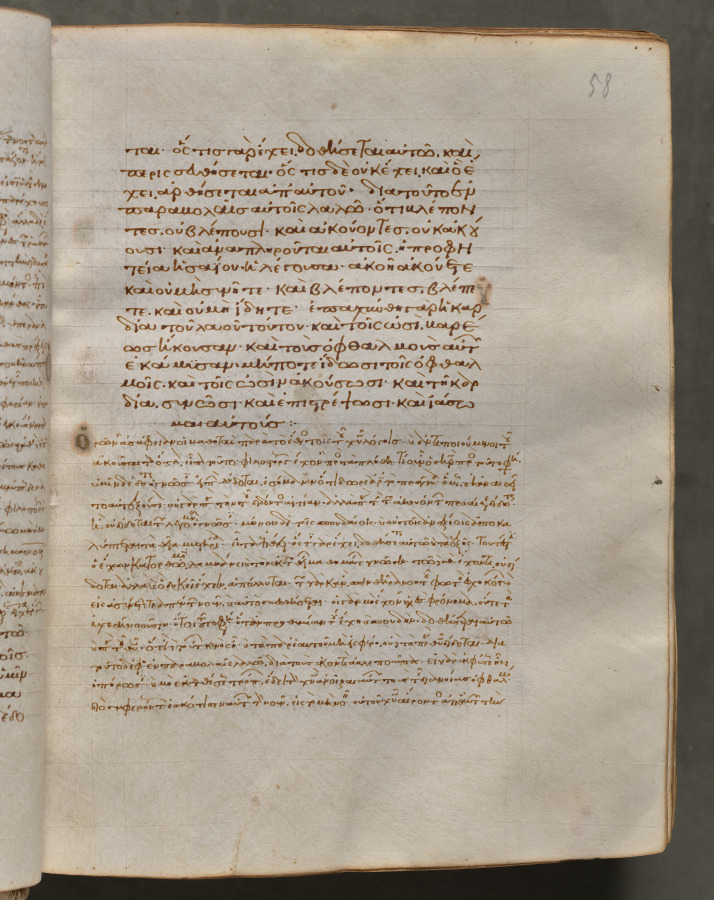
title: Text, folio 58 (recto), from a Gospel Book with Commentaries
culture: Byzantium, Constantinople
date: c. 1000–1100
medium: ink, tempera, and gold on vellum; leather binding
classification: Bound Volume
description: Each of the four gospels in this book opens on a page with brilliantly illuminated borders depicting the author of the text as well as birds-principally peacocks, symbols of the immortality of the soul-and fountains, representing the fountain of life and the salvation of the soul. This volume consists of 428 leaves with texts in Greek. Its level of sophistication suggests that it was probably written and decorated in a monastery in Constantinople.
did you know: Gospel Books were carried in procession through Byzantine churches.